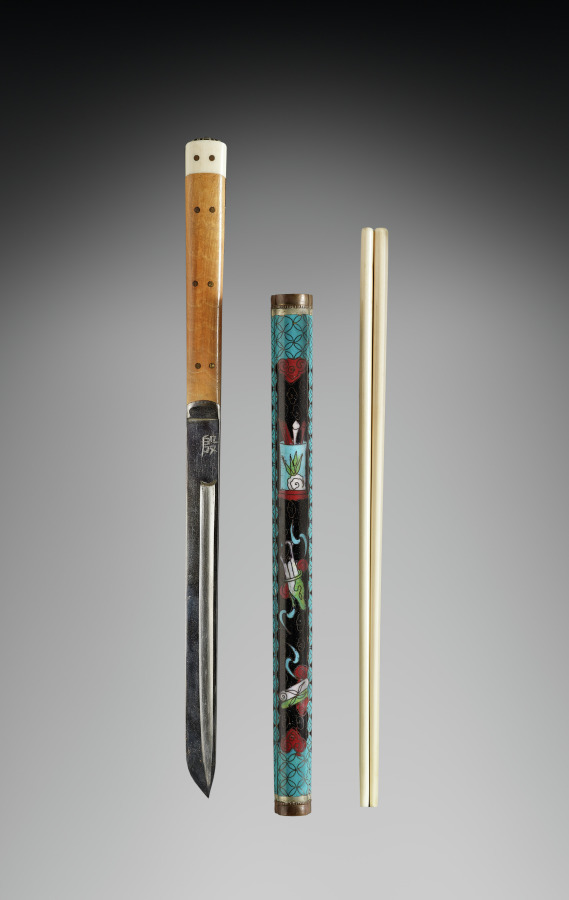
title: Kit with Chopsticks and Knife- Souvenir Trade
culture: Japan, Meiji period (1868–1912) to Taishō period (1912–26)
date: early 1900s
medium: enamel, wood, walrus ivory or bone, metal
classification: Implements